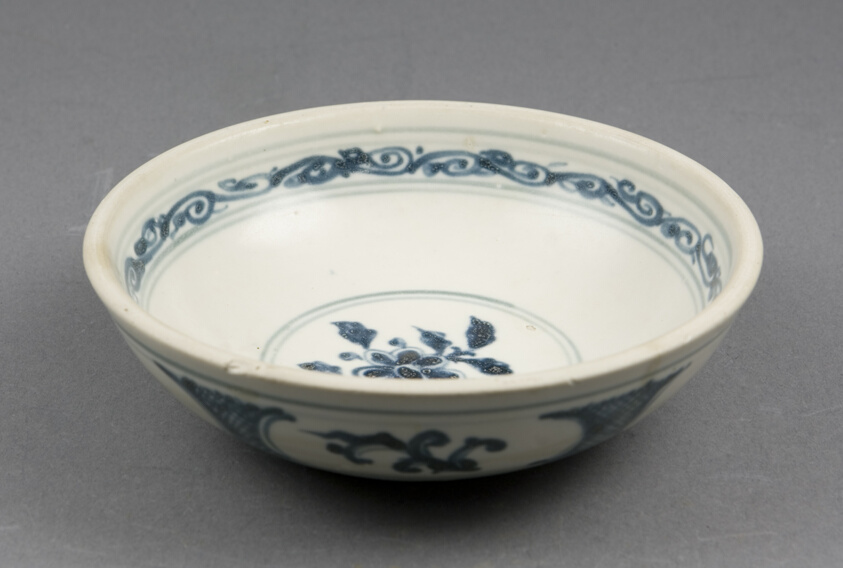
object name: Vessel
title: Small Bowl with Floral and Foliate Motif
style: annamese, vietnamese, Southeast Asian, asian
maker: Vietnam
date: Late 14th/15th century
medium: Glazed stoneware with cobalt-blue underglaze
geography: Vietnam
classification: ceramics; asian art; vessel